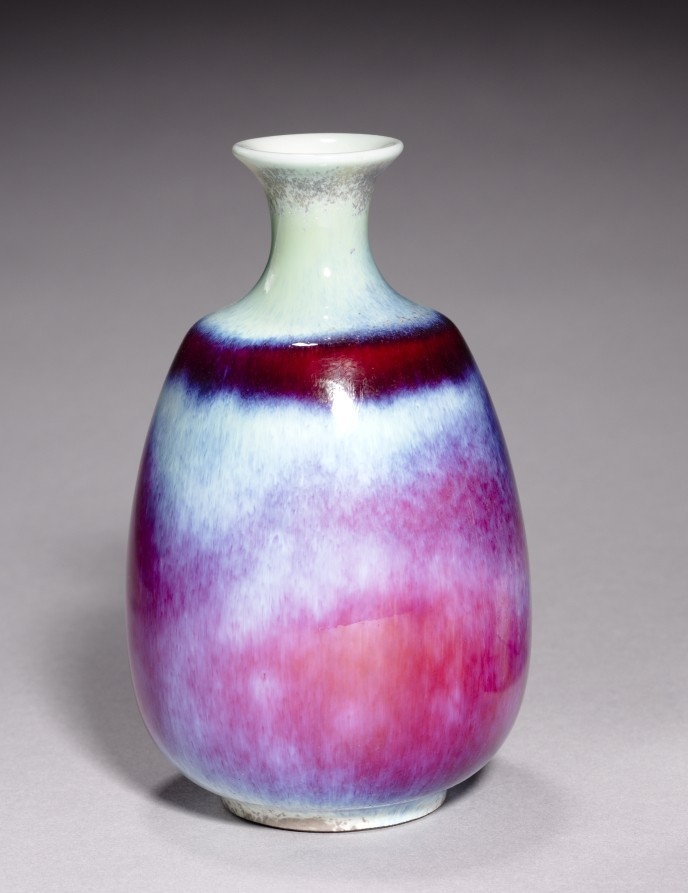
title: Vase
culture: Germany, Berlin, early 20th Century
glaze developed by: Hermann August Seger (German, 1839–1893)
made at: Royal Porcelain Manufactory, Berlin (German)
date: 1900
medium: porcelain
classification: Ceramic